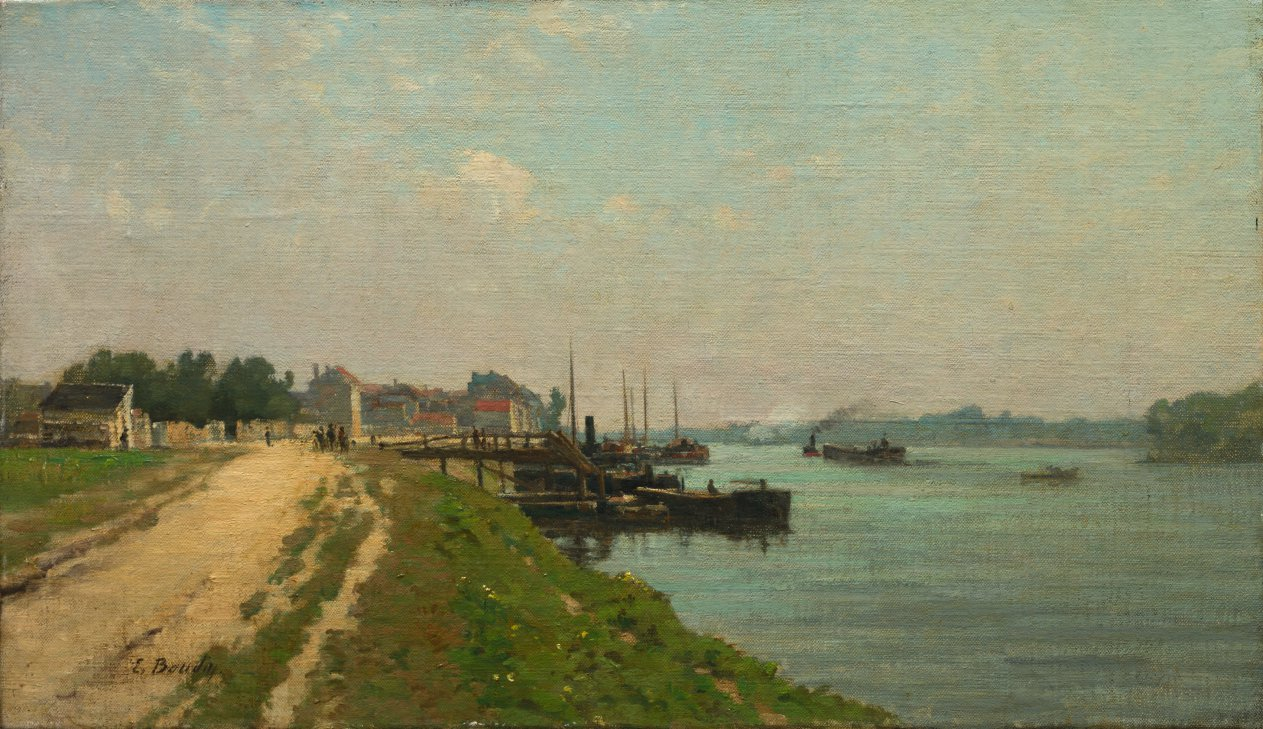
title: Banks of the Seine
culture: France, 19th century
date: not dated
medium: oil on fabric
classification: Painting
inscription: Signed lower left: E. Boudin [originally done in brown paint; has been abraded and reinforced in black]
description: Although this scene was once thought to have been painted by Eugéne Boudin (1824–1898), its creator has yet to be identified.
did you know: The Seine River, especially the mid-Seine valley where Claude Monet lived, is known for being a source of inspiration and subject matter for Impressionist and Post-Impressionist artists.